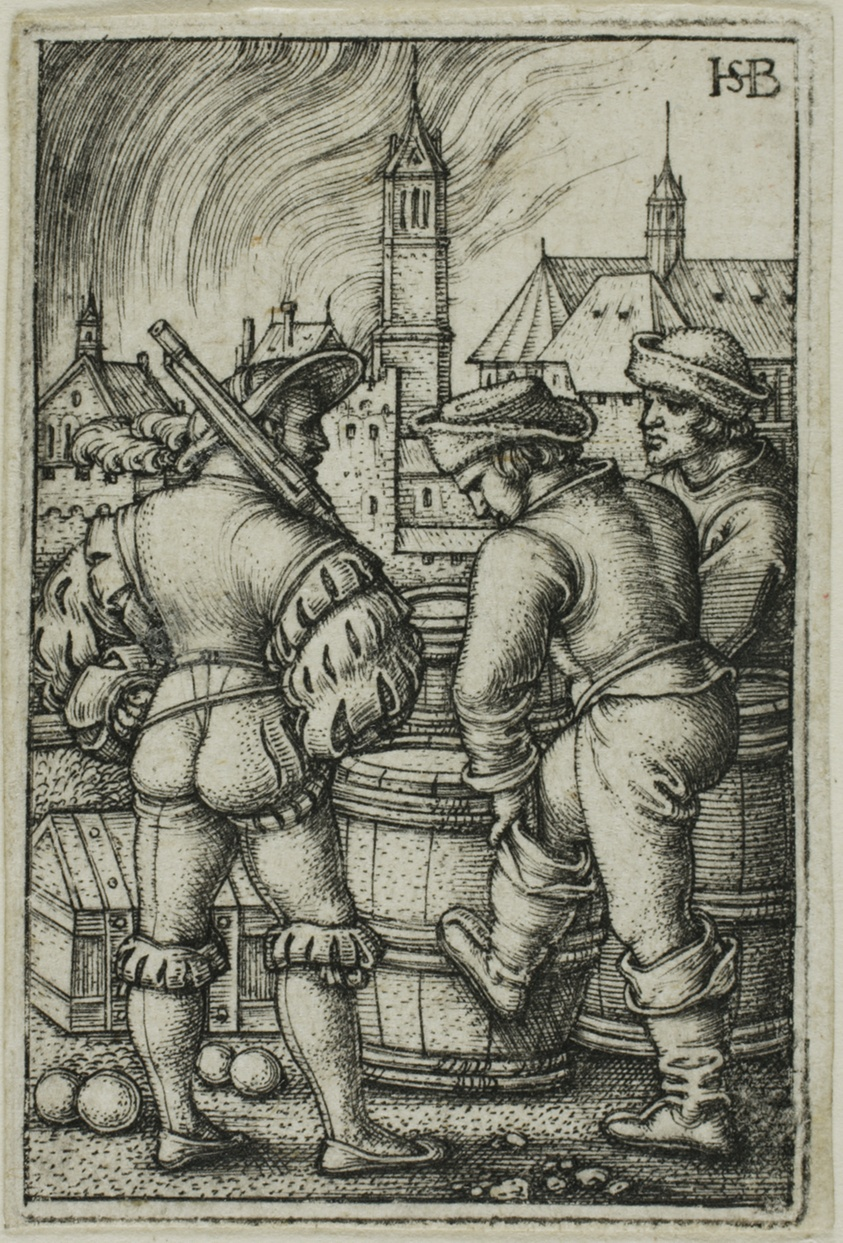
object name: Print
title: The Guard Near the Powder Casks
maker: Sebald Beham; German, 1500-1550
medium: Engraving in black on ivory laid paper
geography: Germany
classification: engraving; print; prints and drawing